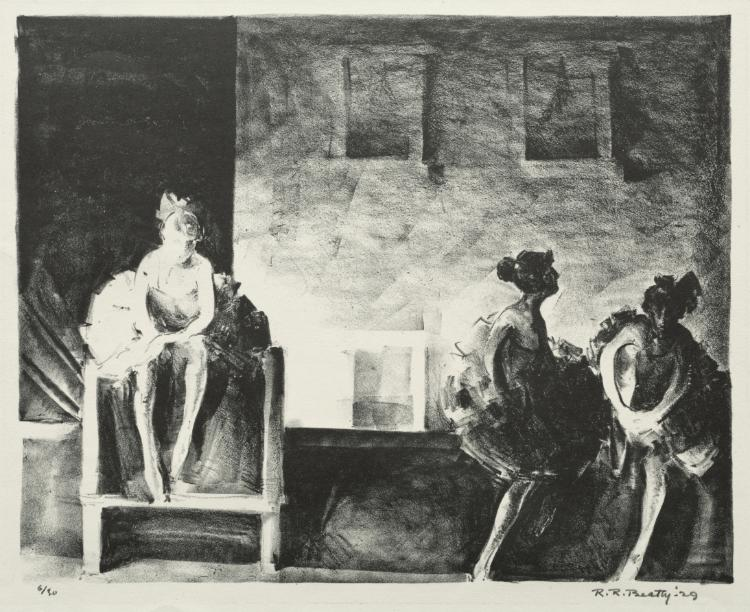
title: Intermission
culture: America, Ohio, Cleveland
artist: Richard Beatty (American, 1899–1961)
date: 1929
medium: lithograph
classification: Print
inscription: inscribed, lower left margin, in graphite: 6/30; lower right margin, in graphite: R.R. Beatty - '29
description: For his skill in lithographs such as this, Richard Beatty was hired as an instructor when Karamu formed a graphic arts program around 1933. While teaching himself lithography at night, Beatty portrayed theater and cabaret scenes using dense, expressive lines with a waxy crayon.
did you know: Theater was immensely popular in Cleveland when Richard Beatty made this print.